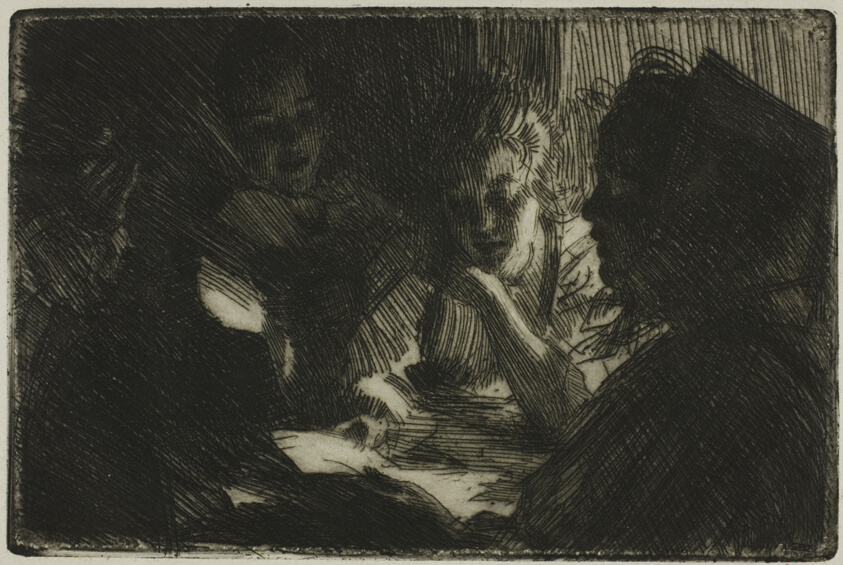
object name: Print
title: The New Ballad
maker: Anders Zorn (Swedish, 1860-1920)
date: 1903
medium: Etching on ivory laid paper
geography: Sweden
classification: etching; print; prints and drawing